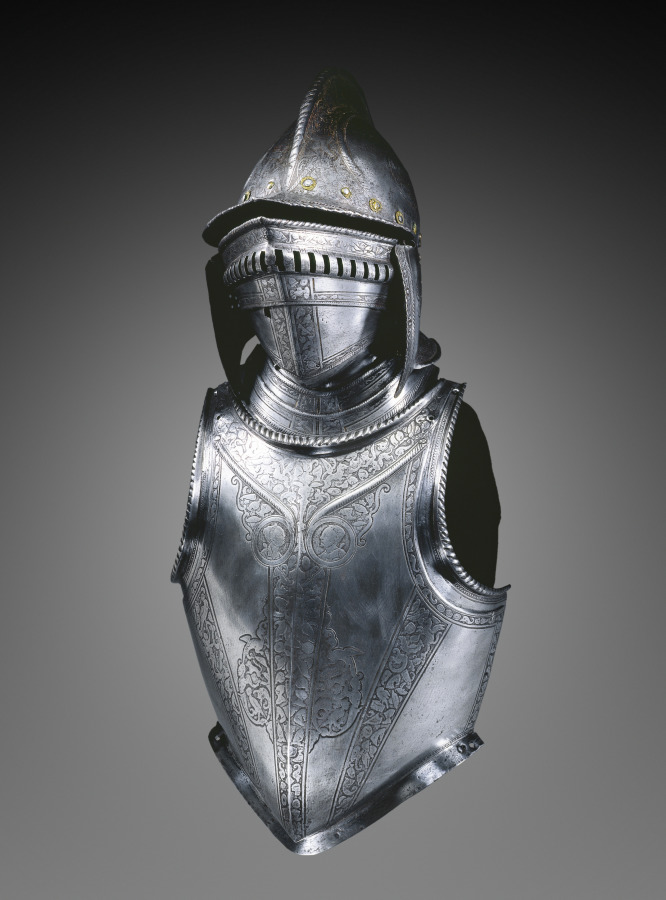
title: Burgonet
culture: North Italy, 16th century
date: c. 1550–1600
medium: steel, etched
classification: Arms and Armor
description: Shown here together is a burgonet, buffe, and breastplate all decorated with a technique known as etching. A burgonetis a light open helmet characterized by a peak, a fall over the eyes, and hinged earpieces. The face is protected by the addition of a buffe, a sperate detachable element worn with the open helmet that extends to the throat. It connects to the breastplate which protects the abdomen and is worn with a backplate.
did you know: Etching is a technique where either the design or its ground is bitten into the metal surface with acid, the rest being protected by a protective wax or varnish.